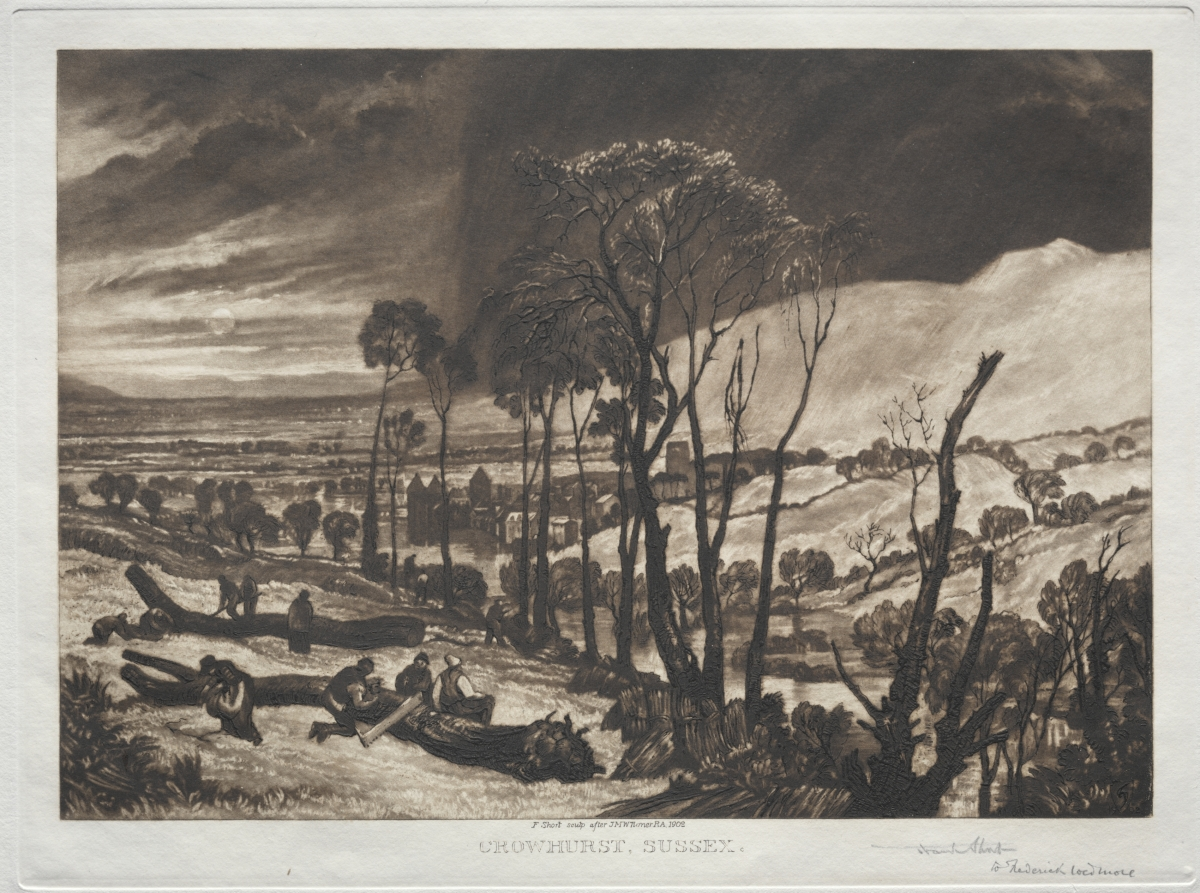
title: Crowhurst, Sussex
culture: England, 20th century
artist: Frank Short (British, 1857–1945)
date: 1902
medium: mezzotint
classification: Print